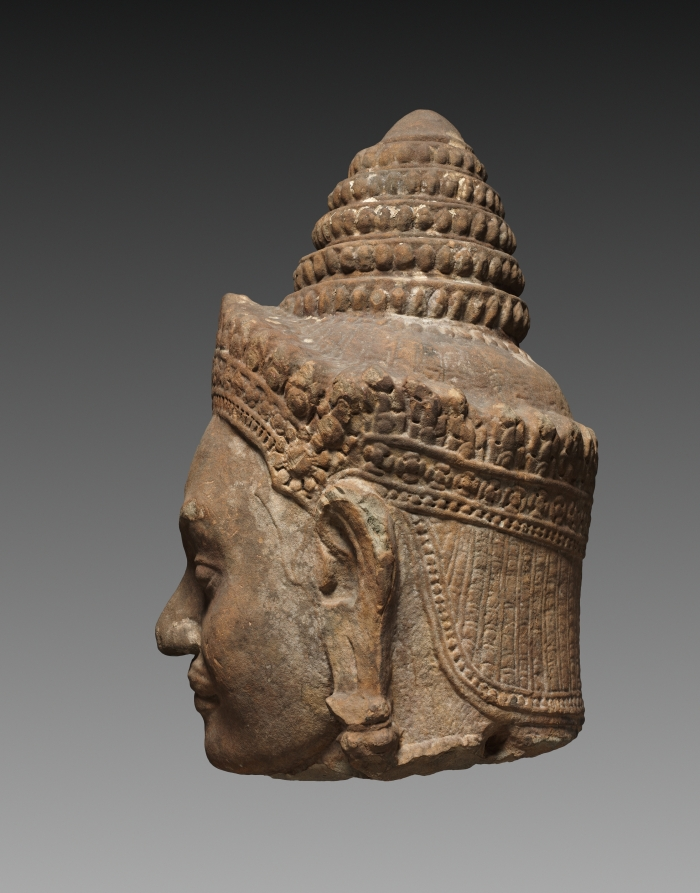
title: Colossal Head of a Deva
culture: Cambodia, Angkor, Preah Khan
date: c. 1200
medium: sandstone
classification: Stone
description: This head is from one of the gods (devas in Sanskrit) who, according to Hindu myth, churned the primordial Ocean of Milk to extract the nectar of immortality. Using a mountain as a churning rod and a serpent as the rope, the gods on one side and the demons on the other vied to win the nectar. The gods prevailed and achieved immortality.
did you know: The deity’s conical tiara consists of a diadem with floral decoration and is topped by a five-tiered lotus narrowing upward.